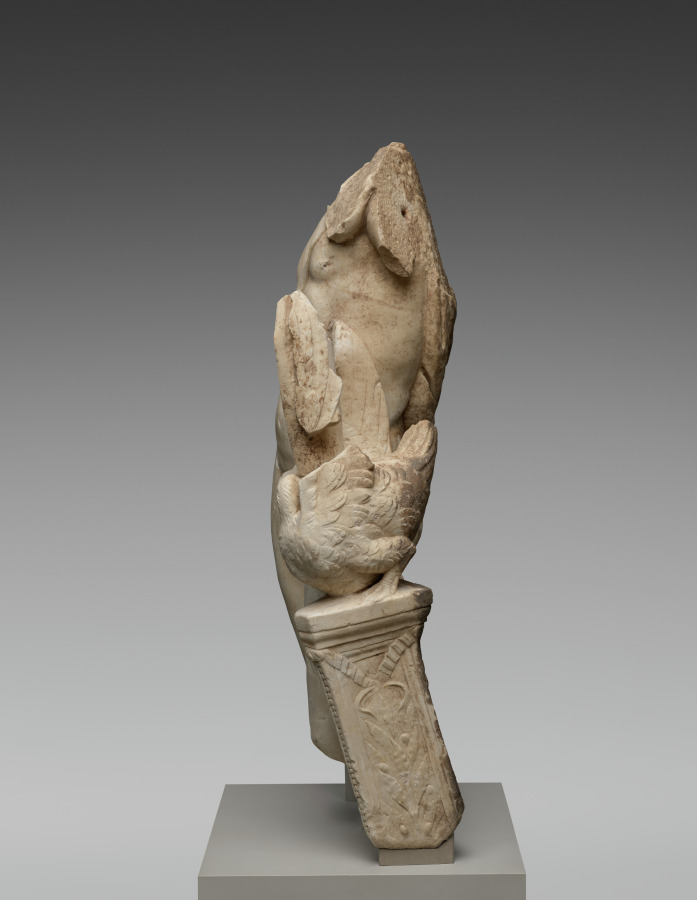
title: Torso of Apollo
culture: Italy, Roman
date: c. 100–200 CE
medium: marble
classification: Sculpture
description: This ancient statue depicts the Greek god Apollo, identified by his youthful body and the fragmentary remains of his kithara, a type of lyre (or stringed instrument) used by poets and musicians in ancient Greece. Both the kithara, decorated with griffins, and the swan upon which it rests (atop a triangular column), signify Apollo’s roles as the god of music and leader of the Muses. Beloved by the Muses for their song, swans were considered sacred to Apollo because he gave them the gift of prophecy. Swans sing a glorious song before they die, knowing they will soon return to Apollo to be reborn.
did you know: Apollo received his lyre from Hermes, who invented it.